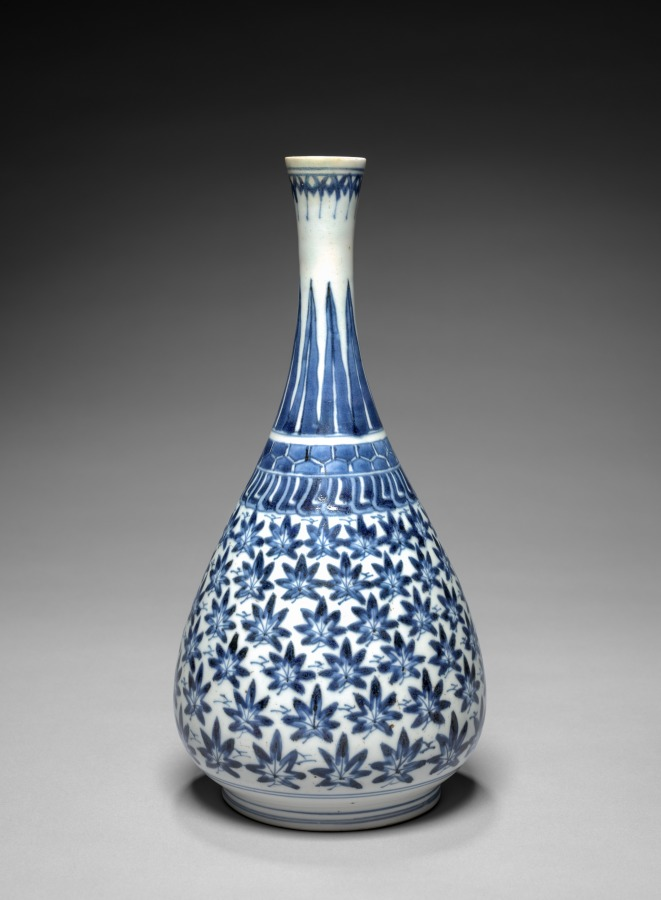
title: Bottle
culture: Japan, Edo period (1615–1868)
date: early 1600s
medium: porcelain painted in underglaze blue (Hizen ware, Arita type, Imari style)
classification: Ceramic